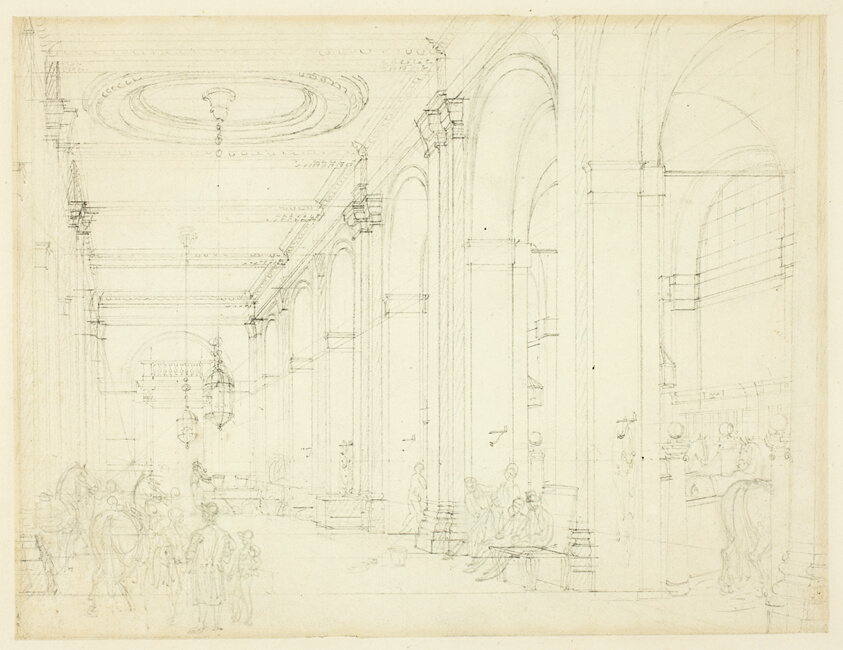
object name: Drawing and Watercolor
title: Study for King's Mews, Charing Cross, from Microcosm of London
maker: Augustus Charles Pugin (English, born France, 1762-1832); Thomas Rowlandson (English, 1756-1827)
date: c. 1808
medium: Graphite on gray laid paper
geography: England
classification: graphite; drawings (visual works); prints and drawing